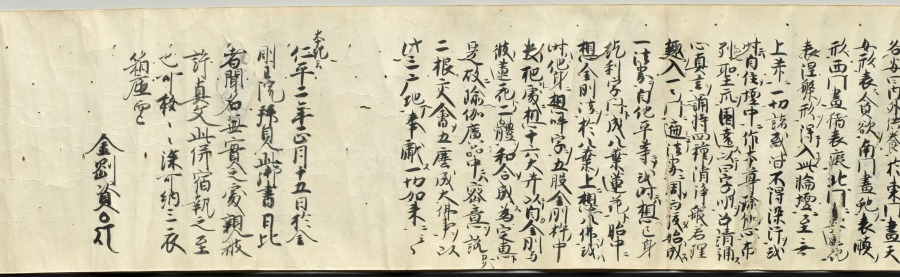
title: Scroll of Miscellaneous Notes written on a Calendar by Priest Seigen (recto)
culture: Japan, Kamakura period (1185–1333)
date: c. 1200–1231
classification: Manuscript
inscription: bears miscellaneous notes written by Priest Seigen.